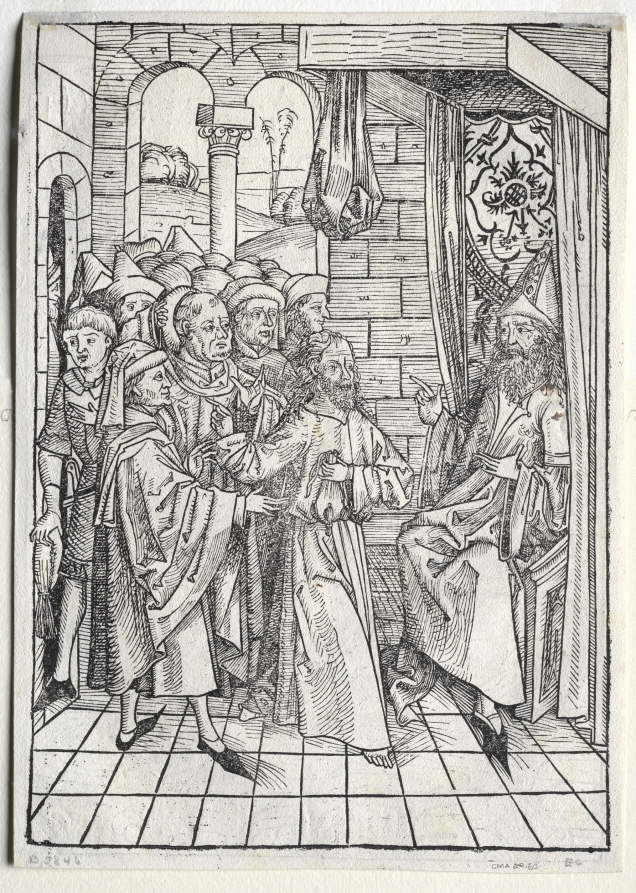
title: Der Schatzbehalter: Christ before Caiaphas (verso)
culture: Germany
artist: Michael Wolgemut (German, 1434–1519)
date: 1491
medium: woodcut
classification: Print